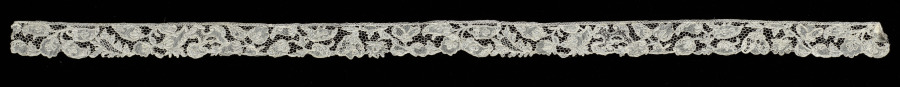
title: Lace Edging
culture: France, Alençon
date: 1700–1740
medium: Linen: needle lace (Point d'Alençon)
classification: Lace